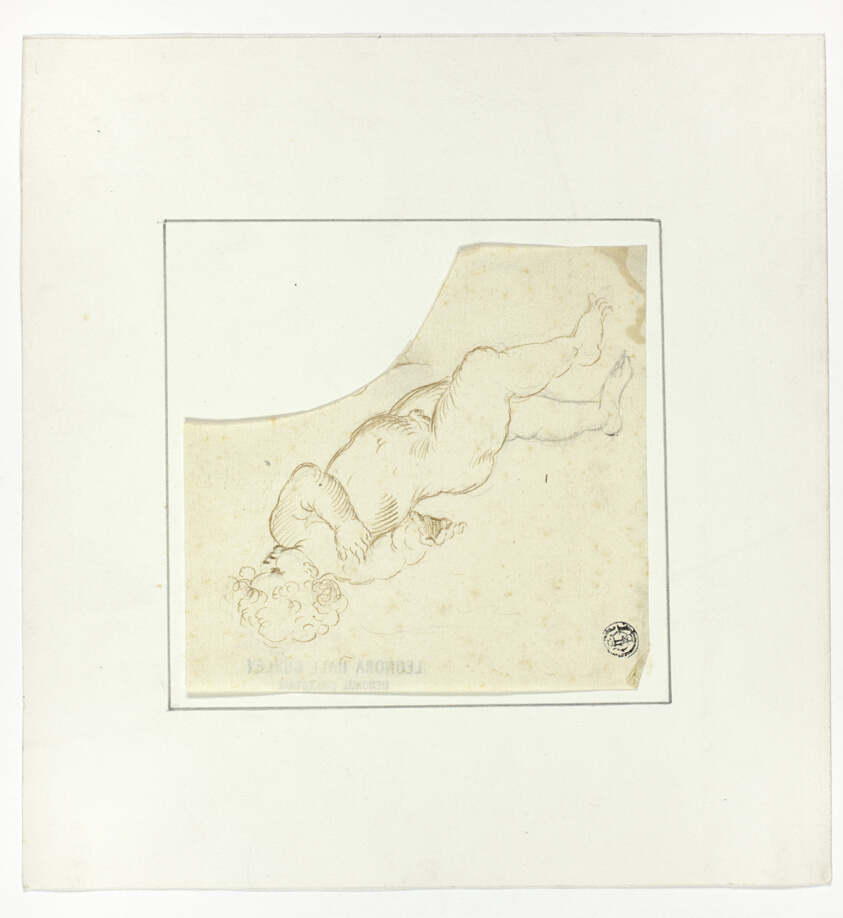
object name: Drawing and Watercolor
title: Putto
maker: School of Ferdinand Bol (Dutch, 1616-1680)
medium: Pen and brown ink, with touches of graphite, on cream laid paper, tipped on off-white wove paper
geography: Germany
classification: pen and ink drawings; drawings (visual works); prints and drawing